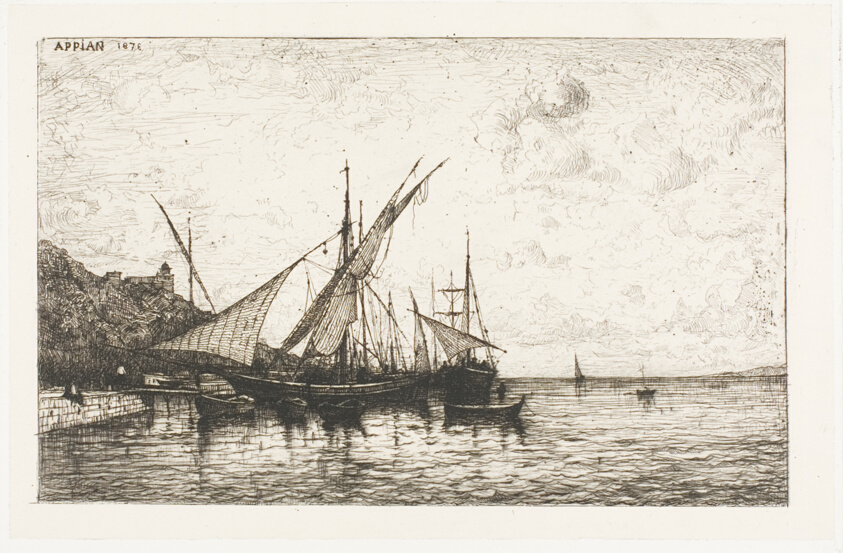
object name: Print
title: The Port of Monaco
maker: Adolphe Appian (French, 1818-1898)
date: 1873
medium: Etching on ivory chine applied to white wove paper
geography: France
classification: etching; print; prints and drawing